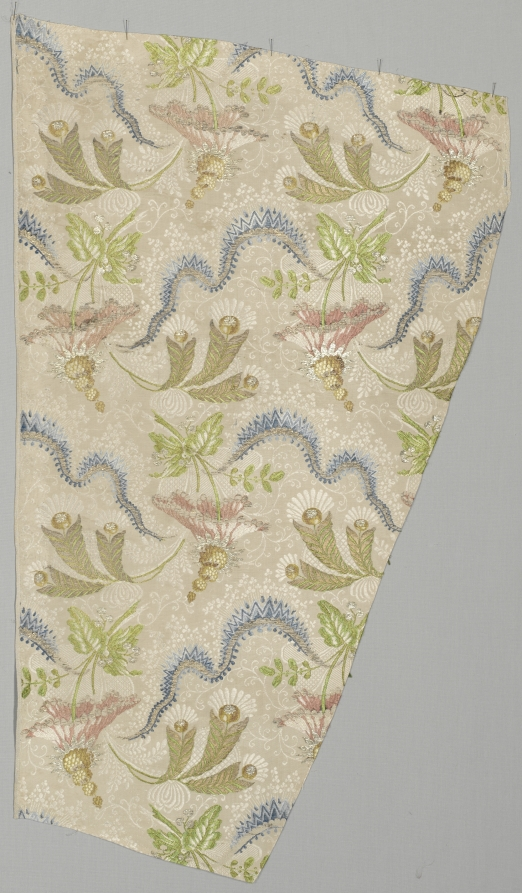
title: Length of Fabric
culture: France, 18th century, Period of Louis XV (1723-1774)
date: 1723–1774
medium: plain cloth, brocaded; silk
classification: Textile